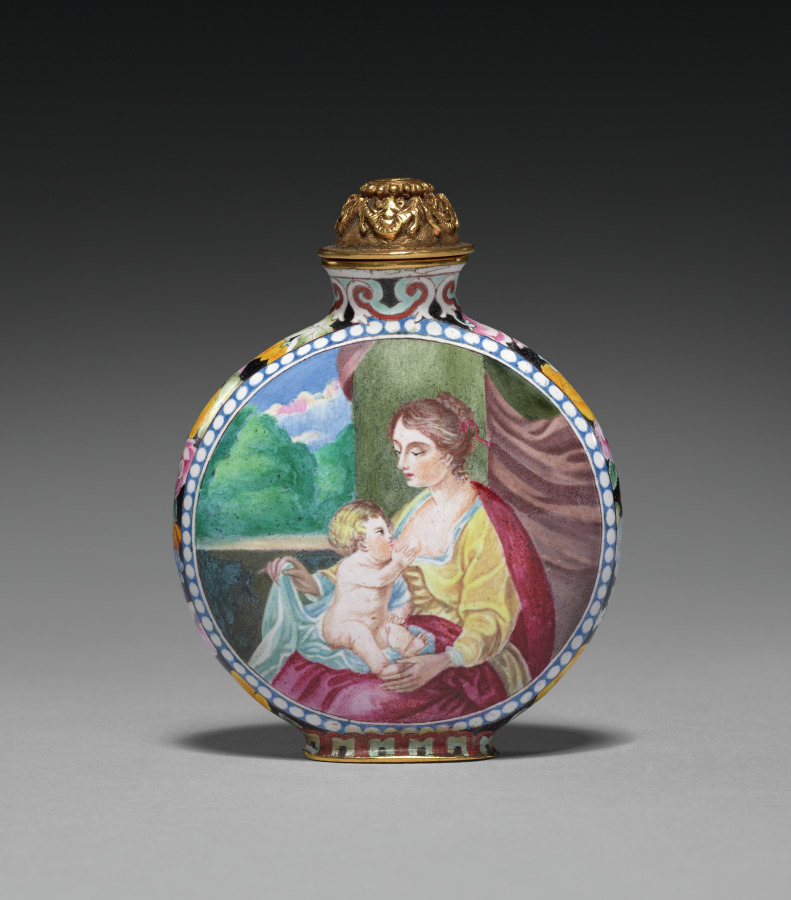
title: Snuff Bottle with European Figures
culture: China, Qing dynasty (1644-1911), Qianlong mark and reign (1736-95)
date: 1736–95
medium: painted enamel on copper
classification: Enamel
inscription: 乾隆年製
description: Snuff bottles were introduced from Europe to China around the 1700s to hold portable snuff or medicine.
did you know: The stopper is decorated with bats, which traditionally symbolize good luck, since both words (蝠 and 福) are both pronounced as fu in Chinese.